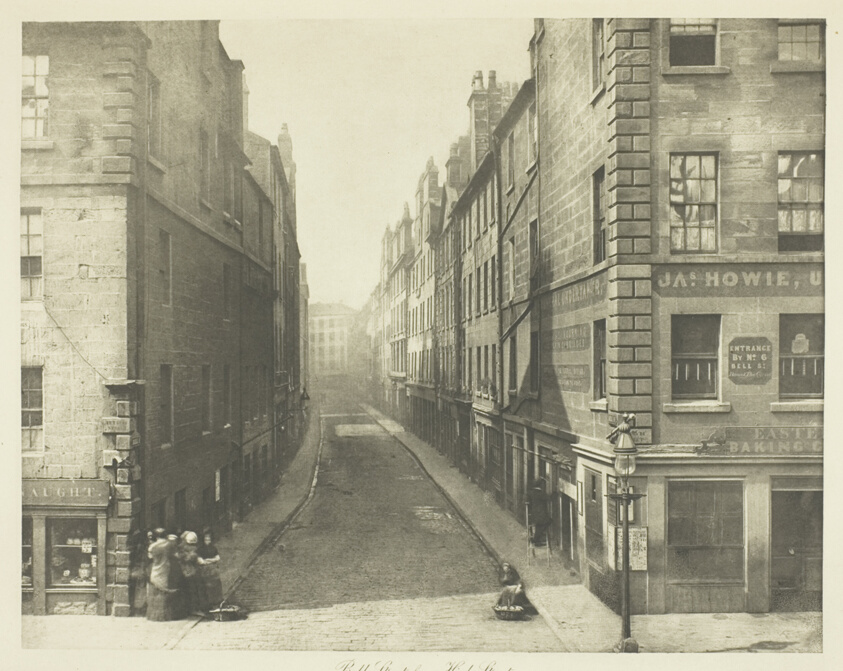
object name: Photograph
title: Bell Street from High Street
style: 19th century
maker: Thomas Annan (Scottish, 1829–1887)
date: 1868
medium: Photogravure, plate 14 from the book "The Old Closes & Streets of Glasgow" (1900)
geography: Scotland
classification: photograph; photography